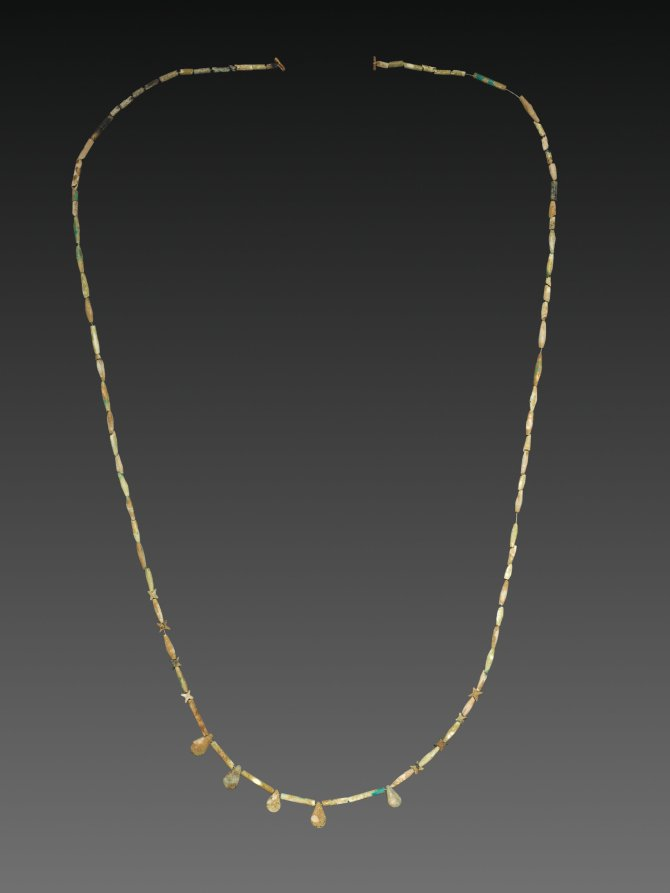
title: Single Strand Necklace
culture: Egypt, Middle Kingdom (2040–1648 BCE)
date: 2040–1648 BCE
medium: faience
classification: Jewelry